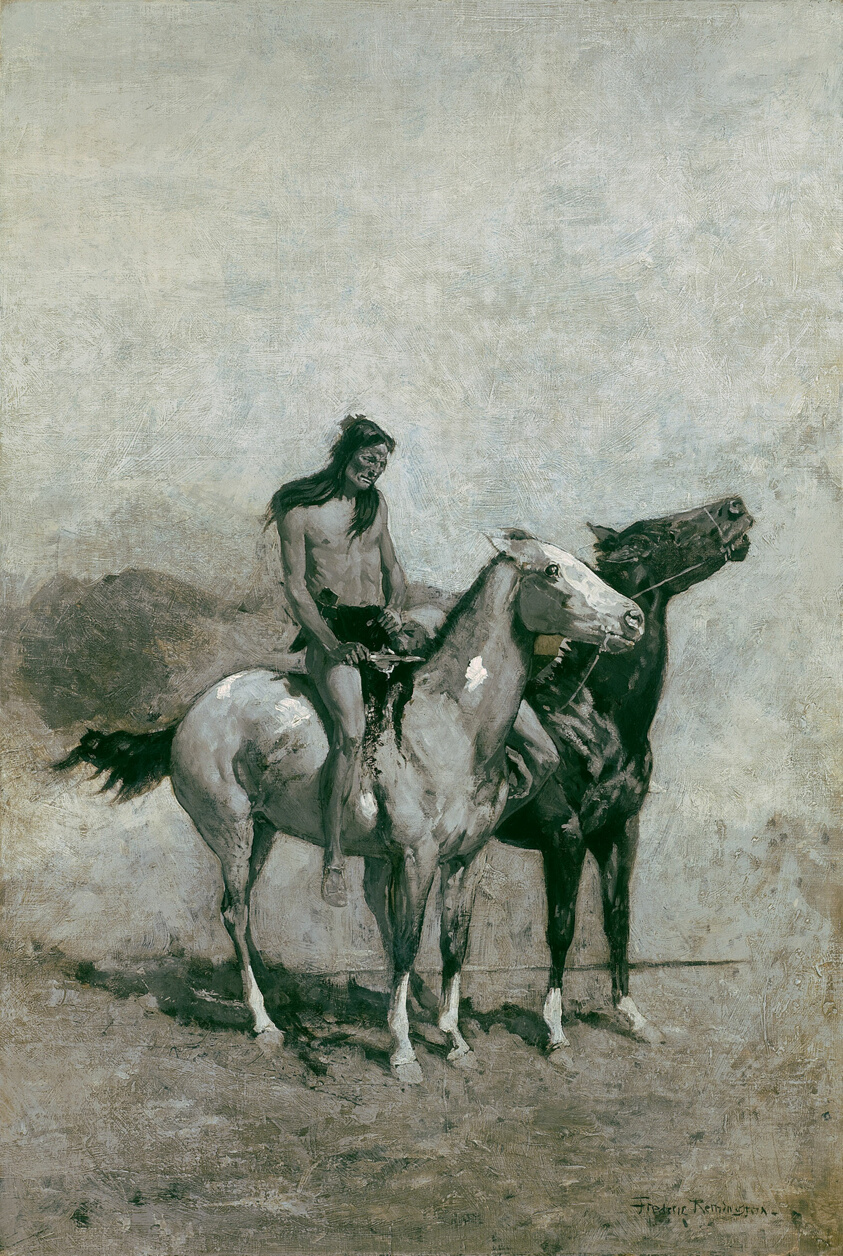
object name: Painting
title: The Fire-Eater Slung His Victim Across His Pony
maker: Frederic Remington (American, 1861–1909)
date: c. 1900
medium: Oil on canvas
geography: New York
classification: painting; american arts